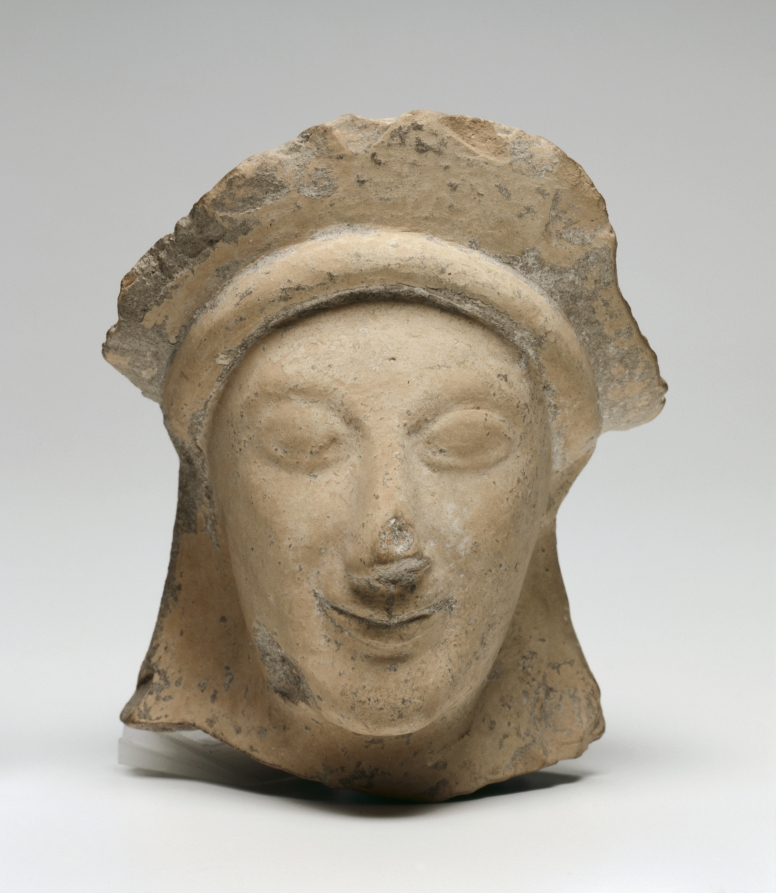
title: Woman's Head with Crown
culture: Greece, Sicily(?)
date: 500s BCE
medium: terracotta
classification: Sculpture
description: This terracotta sculpture depicts a woman with a wide headdress that is partly broken off. Her face is rendered in an Archaic style, with her mouth and eyes in low relief and her lips lifting upward in a serene smile. Originally, details such as the eyes and decoration on the headdress would probably have been painted on the surface of the sculpture.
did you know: In ancient Greek sculpture, a wide crown often denoted a matron deity like Hera or Demeter.